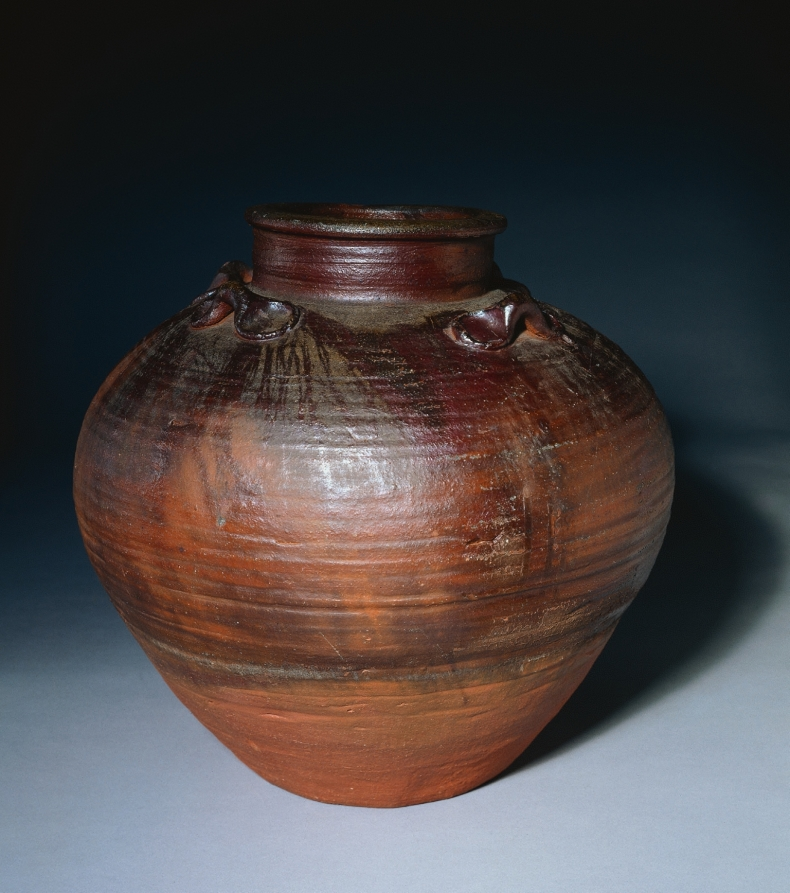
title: Tea Storage Jar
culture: Japan, Momoyama period (1573–1615)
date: c. 1600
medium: Stoneware with natural ash glaze and fire mark (hidasuki) decoration (Bizen ware)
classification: Ceramic